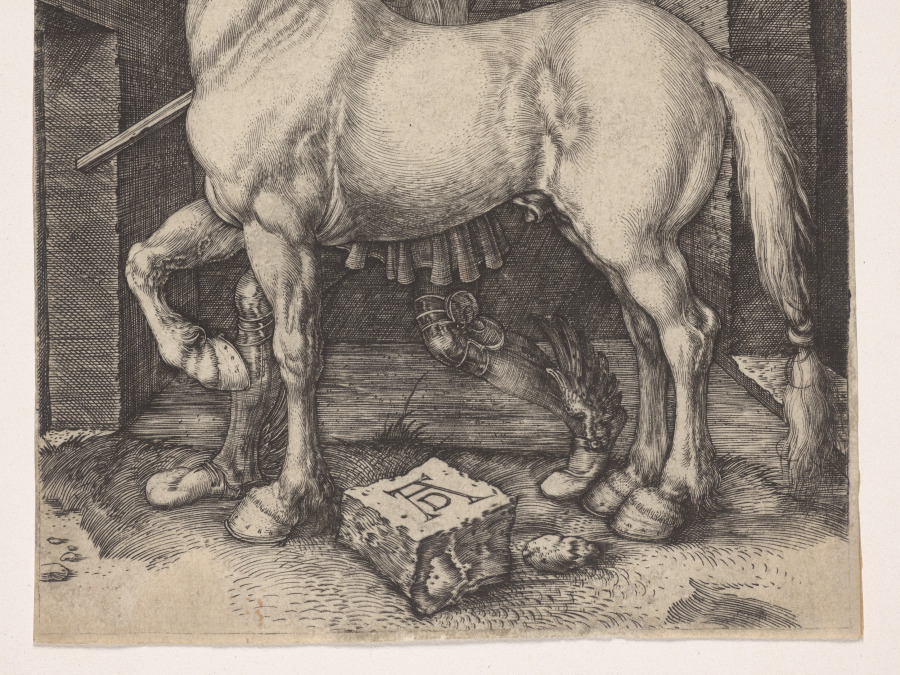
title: The Small Horse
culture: Germany, early 16th Century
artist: Albrecht Dürer (German, 1471–1528)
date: 1505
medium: engraving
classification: Print